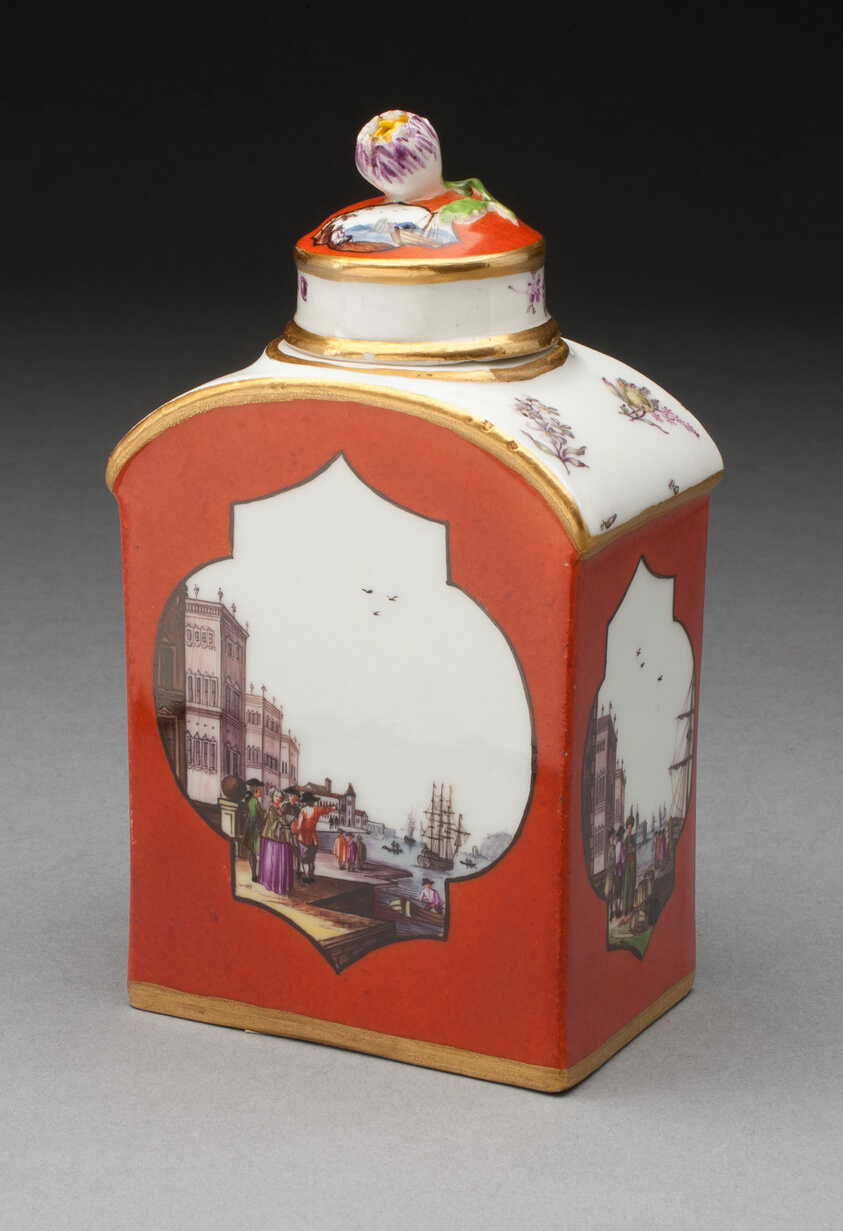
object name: Ceramics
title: Tea Caddy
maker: Meissen Porcelain Manufactory (German, founded 1710)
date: c. 1740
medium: Hard-paste porcelain, polychrome enamels, and gilding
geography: Meissen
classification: teaware; ceramics; porcelain; european decorative arts